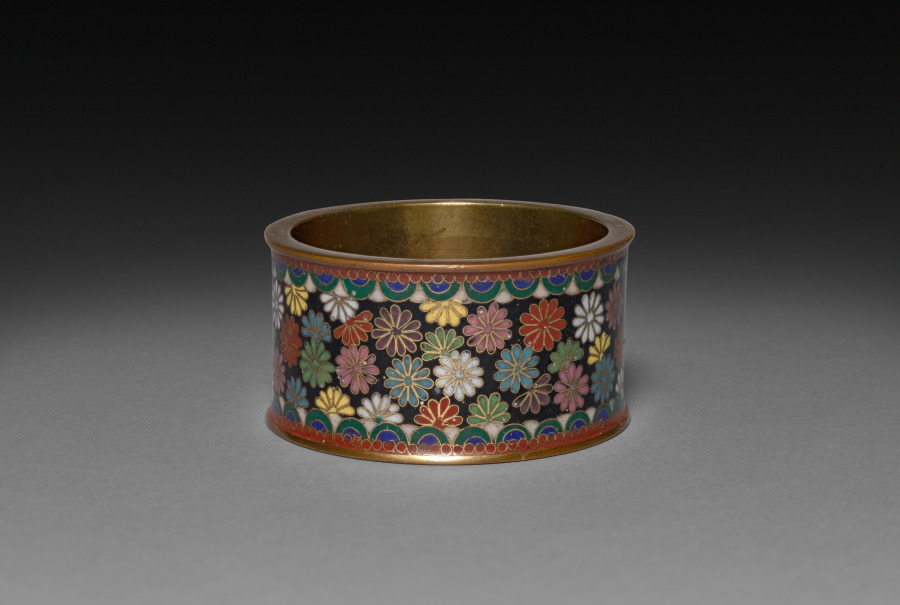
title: Napkin Ring with Flowers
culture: Japan, Meiji period (1868–1912) or Taishō period (1912–26)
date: early 1900s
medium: cloisonne enamel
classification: Enamel